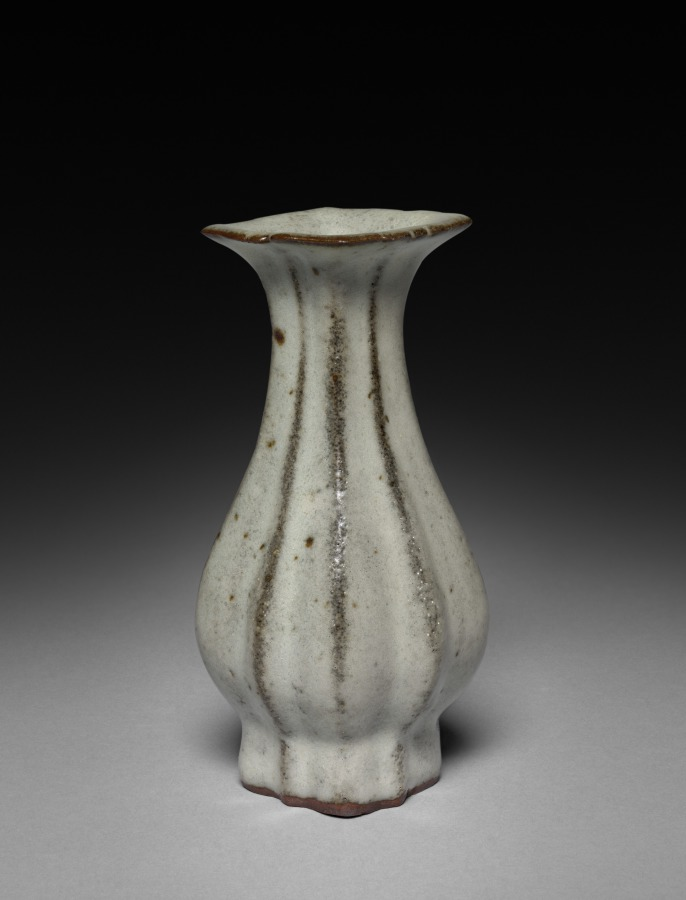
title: Lobed Vase: Guan ware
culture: China, Hangzhou, Suburban Altar Kiln, Southern Song dynasty (1127-1279)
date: 1127–1279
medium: glazed reddish-brown porcelain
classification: Ceramic